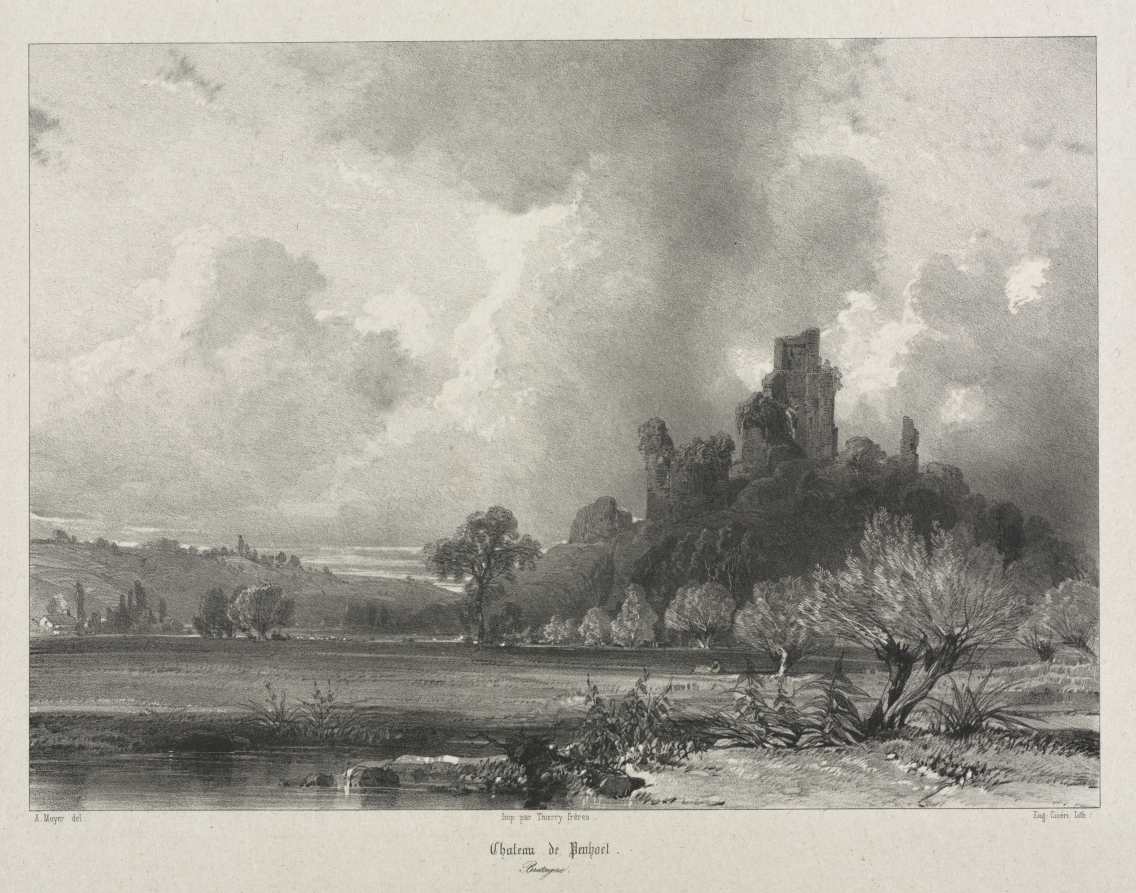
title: Voyages pittoresques et romantiques dans l'ancienne France. Bretagne: Chateau de Penhoet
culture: France, 19th century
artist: Eugène Cicéri (French, 1813–1890)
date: c. 1845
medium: lithograph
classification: Print